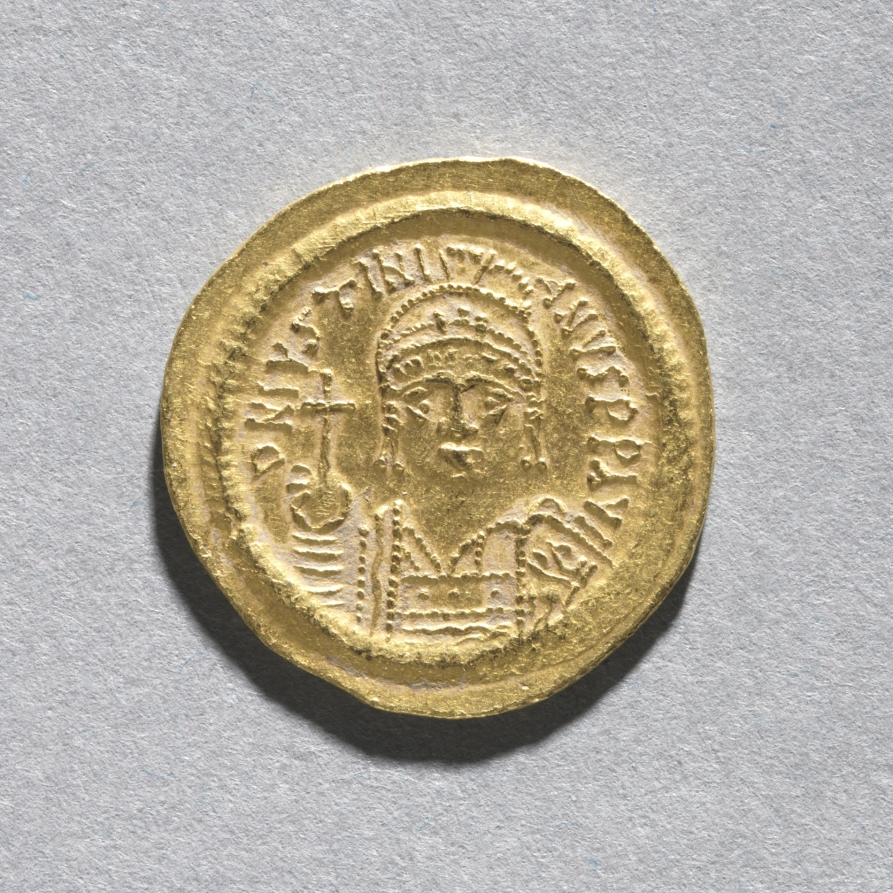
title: Solidus of Justinian I (obverse)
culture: Byzantium, Constantinople, Byzantine period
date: c. 545–565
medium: gold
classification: Coins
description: Byzantine Gold Coins The vast number of surviving Byzantine coins attests to the level of trade across the empire. Controlled and supervised by the emperor, the producers of coins took care to represent his authority and reflect his stature. Talented artists were recruited to engrave the dies (molds) used for the striking of coins. Emperors increasingly came to include their heirs and co-emperors on their coinage, as well as other family members or even earlier rulers. Coins were recognized, then as now, as small, portable works of art. With their inscriptions and images, Byzantine coins provide valuable documentation of historical events and a record of the physical appearance of the emperors. The solidus is the basic gold coin of 24 karats; the tremissis, a gold coin of one-third the weight and value of the solidus; and the nomisma, which in the 10th century replaced the solidus as the standard gold coin.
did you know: This coin is a small portrait of Justinian as a powerful emperor. He wears a crown, holds an orb, and wears a ceremonial sash, all symbolizing his great power.